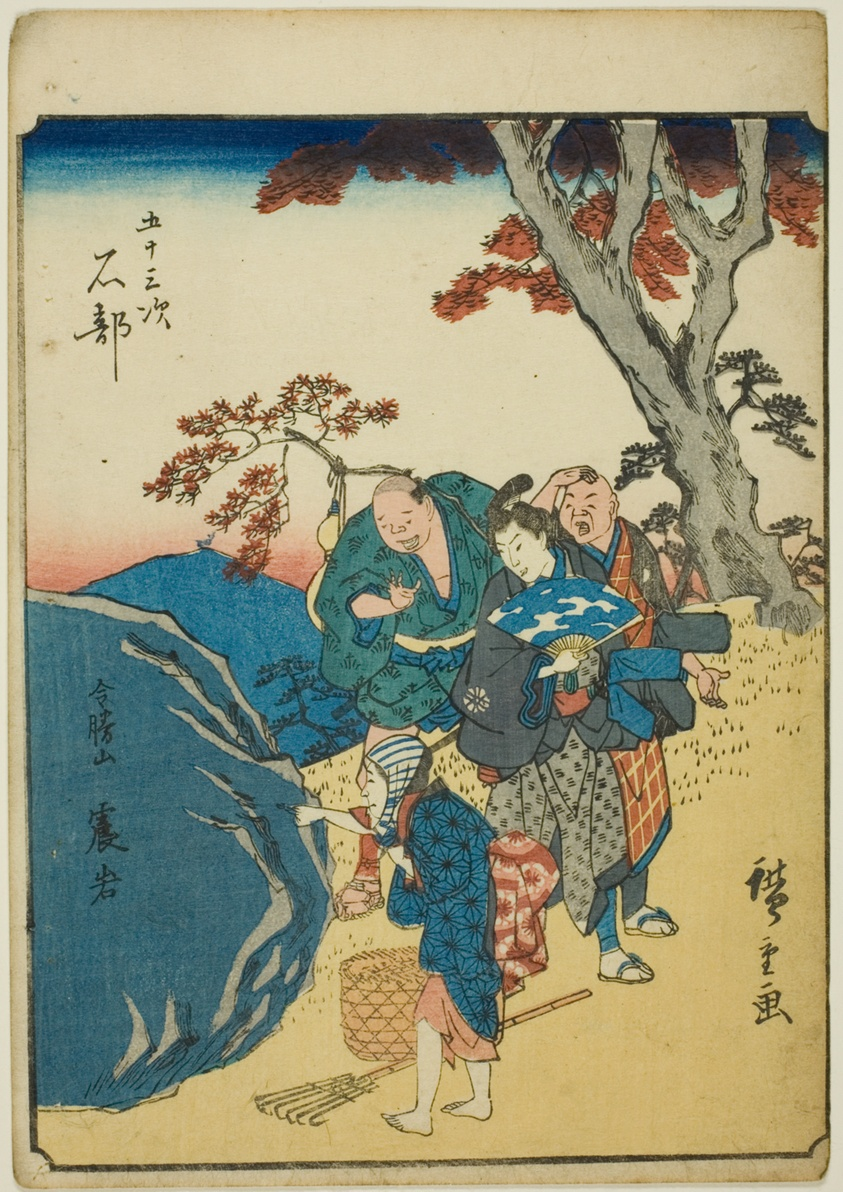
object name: Print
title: Ishibe, from the series "Fifty-three Stations [of the Tokaido] (Gojusan tsugi)," also known as the Figure Tokaido (Jinbutsu Tokaido)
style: Japanese (culture or style)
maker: Utagawa Hiroshige 歌川 広重; Japanese, 1797-1858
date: 1852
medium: Color woodblock print; chuban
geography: Japan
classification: woodblock print; print